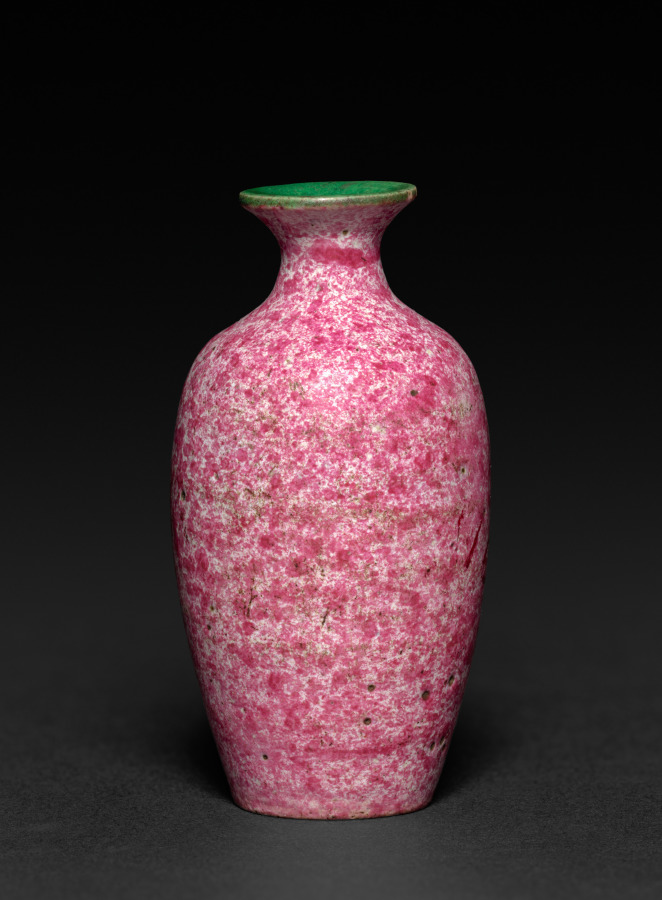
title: Miniature Vase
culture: China, Qing dynasty (1644–1911), Qianlong reign (1736–95)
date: 1736–95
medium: porcelain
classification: Ceramic